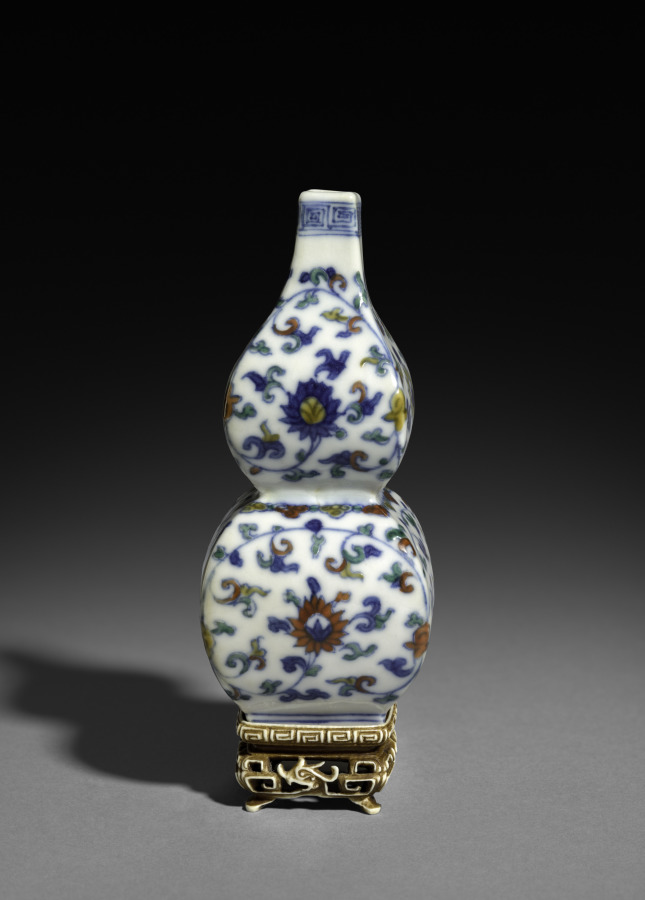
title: Square Double-Gourd Vase with Floral Scrolls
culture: China, Jiangxi Province, Jingdezhen kilns, Ming dynasty (1368–1644), Jiajing mark and reign (1522–66)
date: 1522–66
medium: porcelain with underglaze blue decoration and overglaze enamel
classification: Ceramic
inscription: 大明嘉靖年製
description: In the Ming dynasty (1368–1644), luxury items became more affordable to larger parts of the society, including women, merchants, and literati in non-official positions. Imperial patronage and a growing urban population encouraged consumption of luxury goods and local craftmanship.